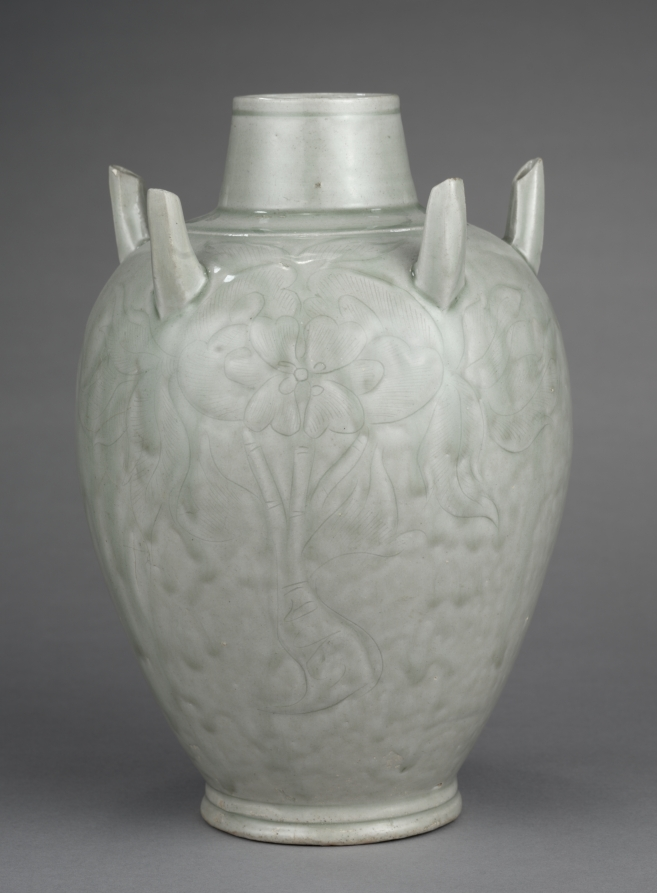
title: Vase with Peonies and Five Spouts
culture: China, Zhejiang province, Hangzhou, Southern Song dynasty (1127-1279)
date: 900s–1000s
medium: green-glazed porcelaneous stoneware with incised decoration, Yue ware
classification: Ceramic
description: "In full autumn wind and dew the kilns of Yue open; And a thousand peaks are despoiled of their halcyon green" (translated by S. W. Bushell). These 9th-century poetic lines glorify the highly prized green-glazed Yue wares of the Tang period. This later example has a pale green glaze that is glassy and consistent, which indicates a precise control of the glaze components as well the kiln atmosphere by reducing the amount of oxygen at some stage during the firing.